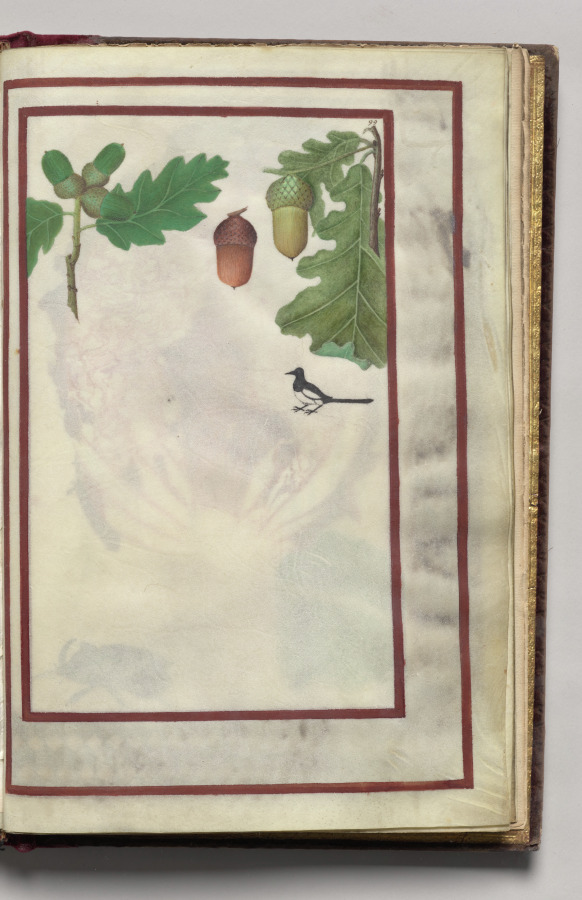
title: Oak Leaves, Acorns, and Bird, folio 44 (recto), from Florilegium (A Book of Flower Studies)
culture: France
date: 1608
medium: watercolor, ink, silver, and gold over occasional traces of pencil, on vellum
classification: Bound Volume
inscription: Dated: Poitiers 1608 (on frontispiece) Signed: On frontispiece in black ink, lower right: Van Kuyk Notation on drawing: Frontispiece: in pencil, lower margin: * élève de Van Kessel, peintre flammand (* in pencil also appears in front of Van Kuyk's name).